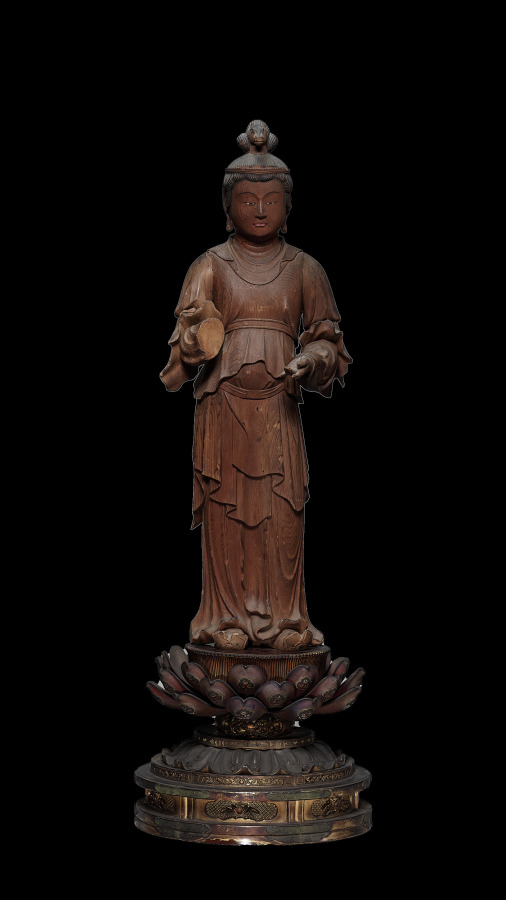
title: Batō (Horse-Headed) Kannon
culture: Japan, Kamakura period (1185–1333)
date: early 1300s, pedestal 1600s–1700s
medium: Wood with traces of color and gold; pedestal: wood with lacquer, color, and gold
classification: Sculpture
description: Batō Kannon, or Hayagriva Avalokiteshvara in Sanskrit, is the “horse-headed” form of the bodhisattva of compassion, who presides over the realm of animals in the Buddhist Six Realms of Transmigration (rebirth). A horse’s head appears in the hair of this sculpture to identify it. Bodhisattvas are beings who, though enlightened, choose to remain within the worlds of existence to help others. The six realms are heaven, hell, human, animal, hungry ghost, and ashura, or fierce supernatural entities.